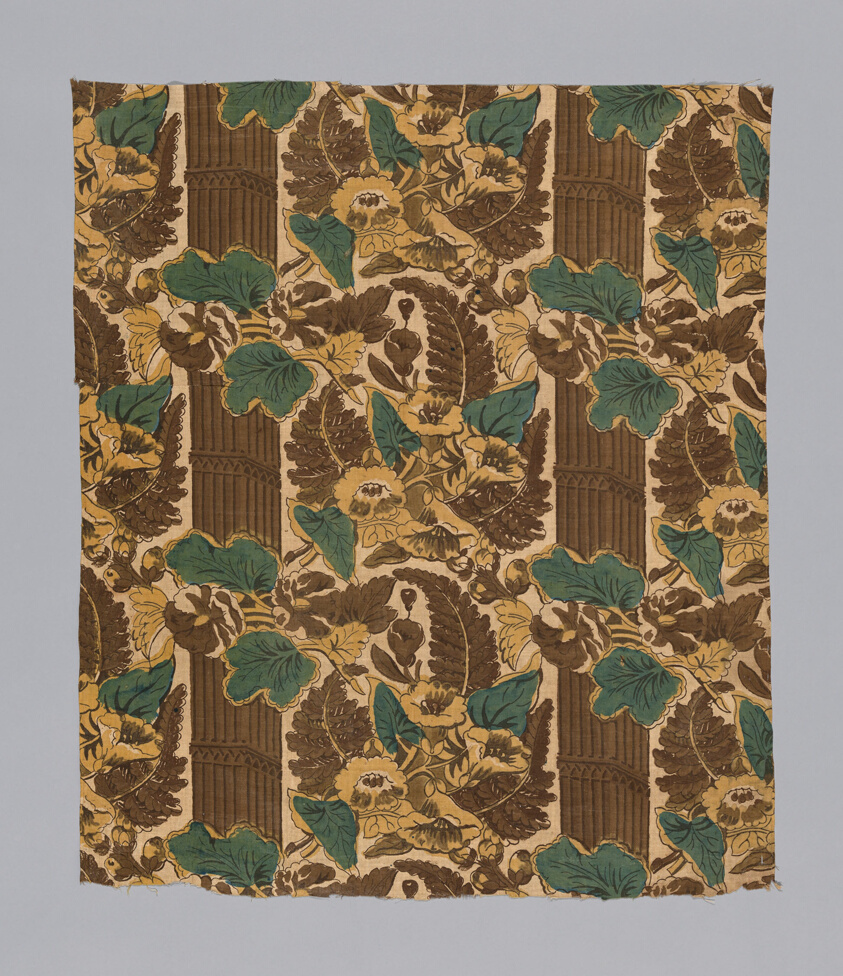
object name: Textile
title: Panel (Pillar Design)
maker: England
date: 1820s/30s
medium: Cotton, plain weave; block printed; painted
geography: England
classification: textile; weaving - printed; weaving